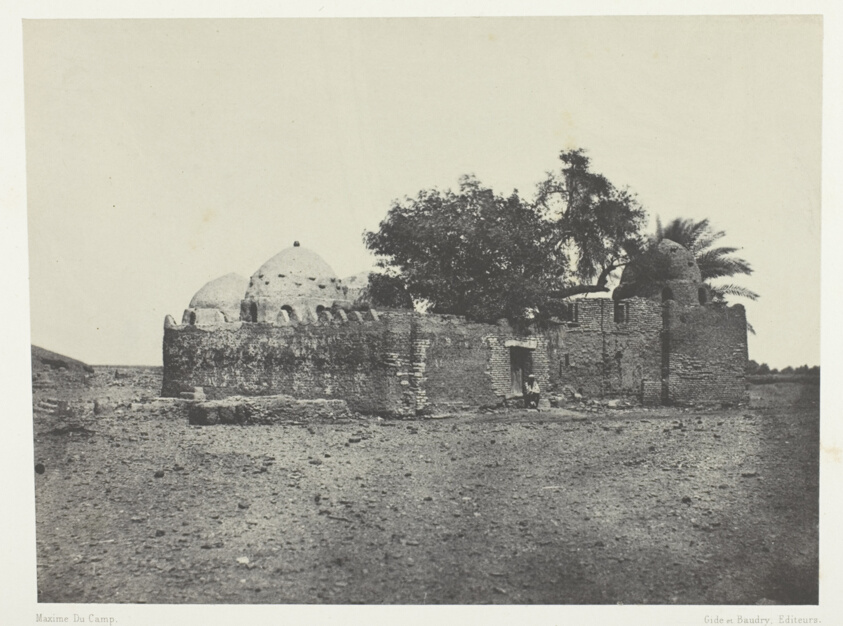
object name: Photograph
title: Tombeau de Cidi-Abdellah-el-Marabout, Haute-Egypte, plate 62 from the album "Egypte, Nubie, Palestine et Syrie" (1852)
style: 19th century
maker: Maxime Du Camp (French, 1822–1894); printed by the Imprimerie Photographique de Blanquart-Evrard (French, founded 1851)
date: 1849/51, printed 1852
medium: Salted paper print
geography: France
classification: salted paper print; photographic process; photography; photograph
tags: Collected by Hugh Edwards, Egypte, Nubie, Palestine et Syrie